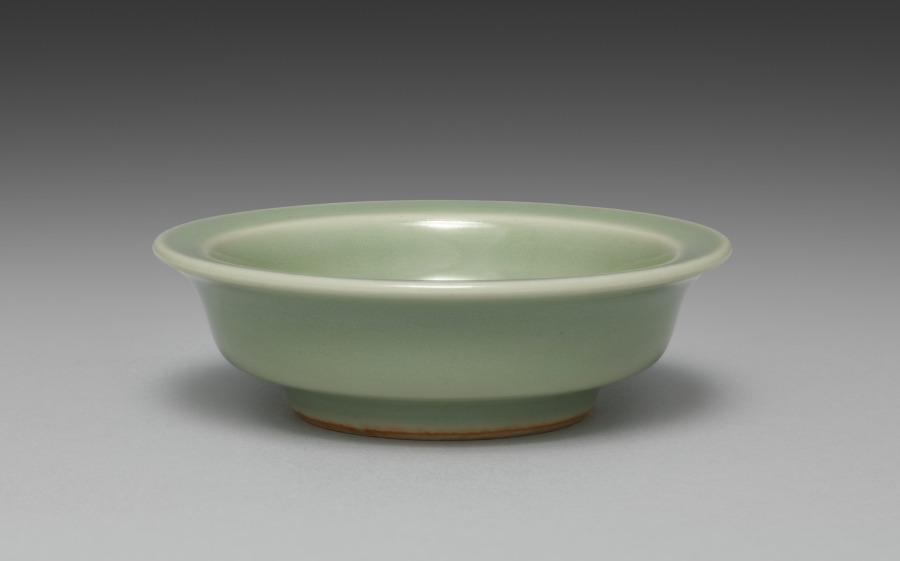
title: Saucer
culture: Japan, Meiji period (1868–1912)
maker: Seifū Yohei III (Japanese, 1851–1914)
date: 1893–1914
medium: One from a set of ten dishes; porcelain with green glaze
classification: Ceramic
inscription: 清風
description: Yohei III’s main output for his sophisticated clientele was in the form of tea sets and dining sets. He created a range of dishes in green glazes. He often produced in pairs, sets of five, or sets of ten. For this set of ten small dishes in a simple, round form that emphasizes the glaze above all, the box lid designates the piece as seiji, or green-glazed porcelain, using a general term for the extensive palette of green glazes often called celadon in English. The box lid further identifies the dishes themselves as tōchō, literally “bean-sized saucers,” a size that makes them suitable for dipping sauces.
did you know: The ten dishes in this set are stored in stacks of five in a two-compartment box.